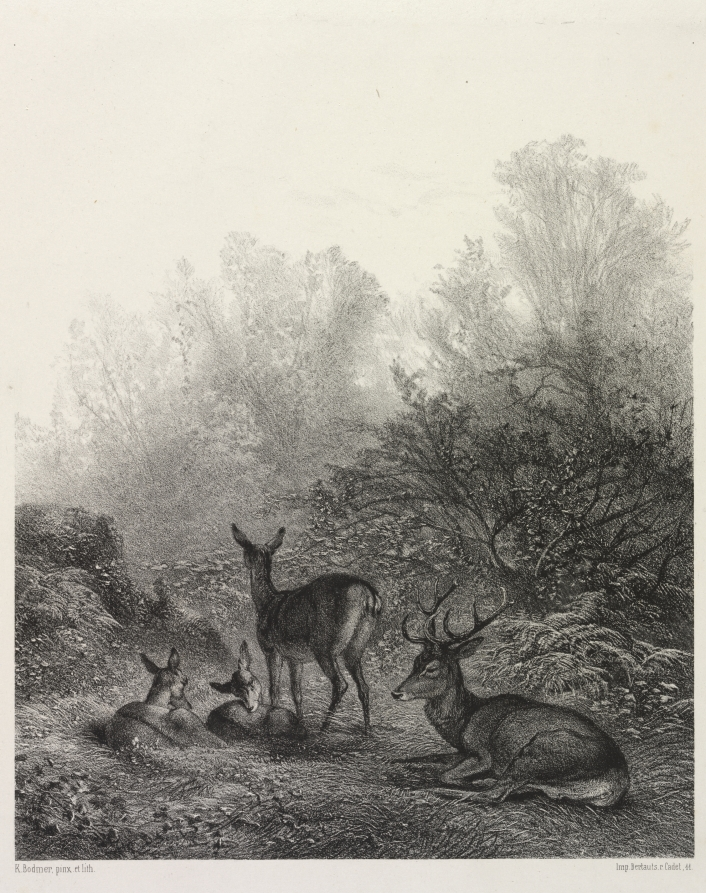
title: Deer at Rest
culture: Switzerland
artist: Karl Bodmer (Swiss, 1809–1893)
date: c. 1860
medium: lithograph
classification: Print